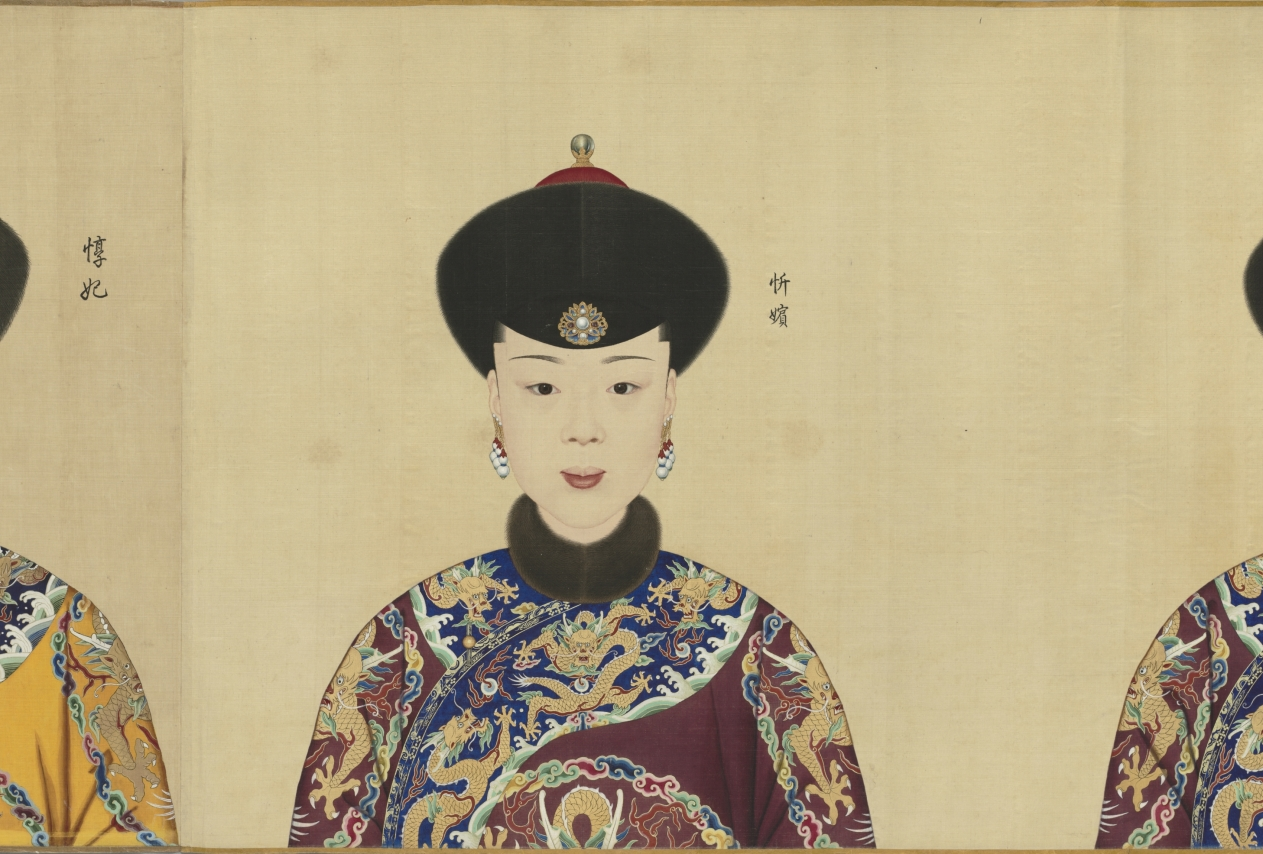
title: Portraits of the Qianlong Emperor and His Twelve Consorts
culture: China, Qing dynasty (1644–1911), Qianlong reign (1736–95)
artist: Giuseppe Castiglione (Italian, 1688–1766)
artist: and others (Chinese)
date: 1736–70s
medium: Handscroll; ink and color on silk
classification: Painting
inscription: 9 seals of the Qianlong emperor (r. 1736–95).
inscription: The eighth month, first year of Qianlong [1736] 乾隆元年八月吉日. The Empress (Xiaoxian) 皇后 (1712–1748), The Guifei (Huixian) 貴妃 (?-–1745), Chunfei 純妃 (1713–1760), Jiafei 嘉妃 (?–1755), Lingfei 令妃 (1727–1775), Shufei 舒妃 (1728–1777), Qingbin 慶嬪 (1724–1774), Yingbin 穎嬪 (1731–1800), Xinbin 忻嬪 (?–1764), Dunfei 惇妃 (1746–1806), Xunfei 順妃 (1749–1788), Shunbin 循嬪 (?–1797).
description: This portrait shows the Qianlong emperor at 26, in the first year of his reign. His likeness is followed by portraits of the empress and eleven consorts. Their portraits document the appearances of the court women around the time when they received their respective imperial titles, which occurred at different stages of the emperor's life. The first three portraits were done by the Jesuit (Roman Catholic) missionary artist Giuseppe Castiglione, whereas the later ones were by Chinese court painters. Formal portraiture contributed to the affirmation of status and construction of role and identity. This scroll served as both familial documentation and a "mind picture" of the Qianlong emperor, suggesting that his constructed image of emperorship was inseparable from concepts of self and family. It was stored in a carved red lacquer box bearing the original painting title Mind Picture of a Well-Governed and Tranquil Reign (see CMA 1969.32).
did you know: Lingfei 令妃 (1727–1775), the first consort depicted in the maroon or “incense-colored" 香色 robe, was the mother of six of Qianlong’s children, including the future Emperor Jiaqing.